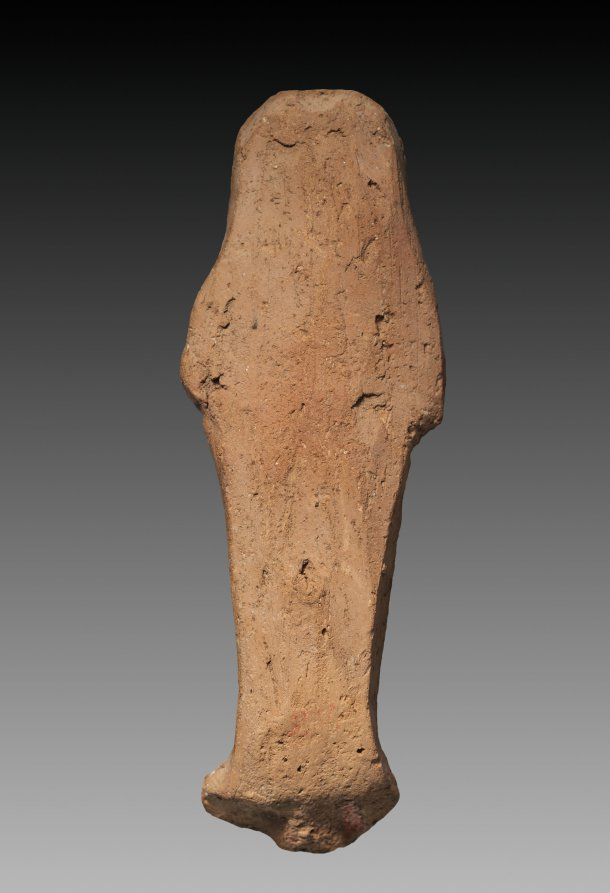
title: Shawabty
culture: Egypt, New Kingdom (1540–1069 BCE), Dynasty 19, reign of Ramesses II (1279–1213 BCE)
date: 1250–1213 BCE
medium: terracotta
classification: Funerary Equipment